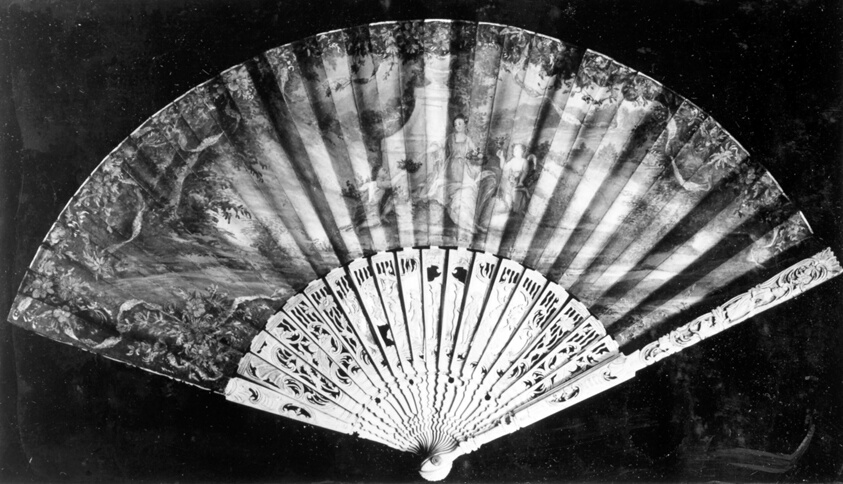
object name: Costume and Accessories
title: Fan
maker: France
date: 18th century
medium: Carved ivory sticks and guards; painted paper mount; top of sticks: wood, plain black; pearl rivet; sticks backed with pearl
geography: France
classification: textile; fan - paper; costume accessory - folding fan; costume